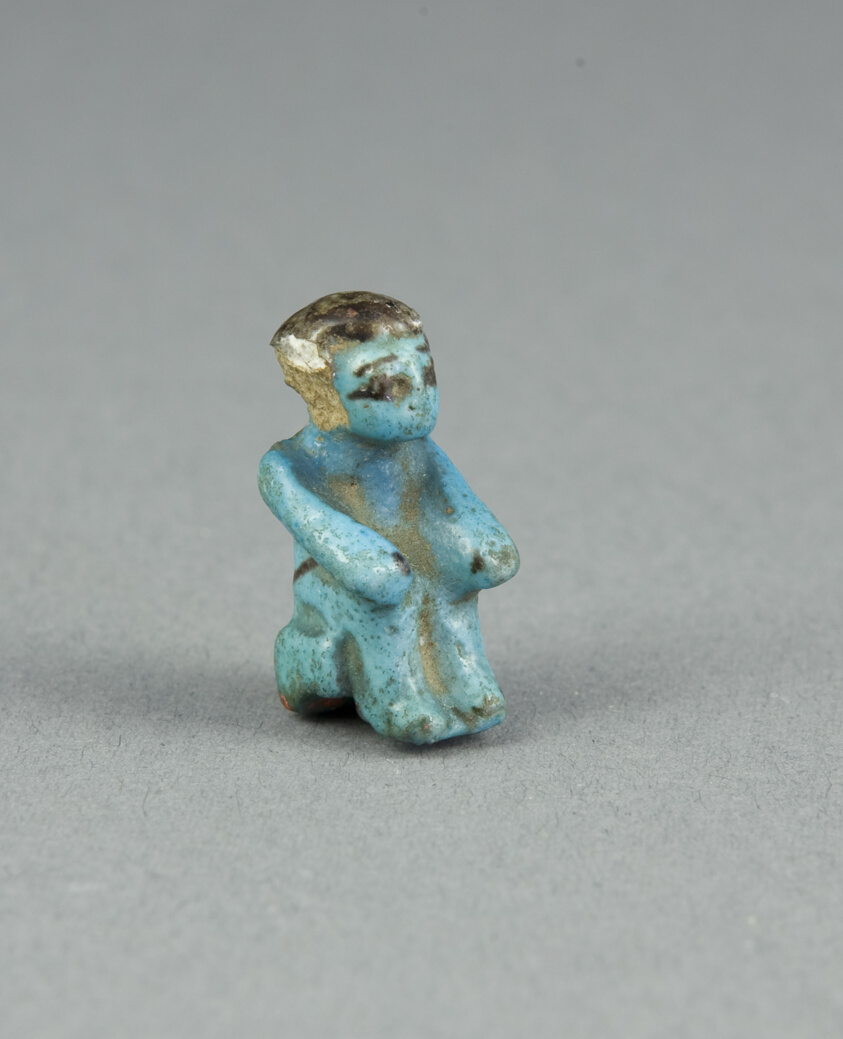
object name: Costume and Accessories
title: Figurine of a Seated Man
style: egyptian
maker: Egyptian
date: Middle Kingdom? (about 2055–1650 BCE)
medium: Faience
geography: Egypt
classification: amulet; unidentified; jewelry; ancient art; costume; faïence (composite material)